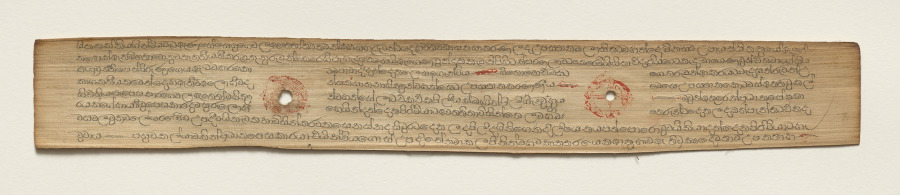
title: Leaf from a Buddhist Manuscript (verso)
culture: Sri Lanka, Singhalese, Late 17th century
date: c. 1700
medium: fiber paper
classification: Manuscript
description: Palm leaf material is still used for manuscripts in Sri Lanka. The palm leaves are prepared first by boiling them, drying them in the sun, and then rubbing them with oils. Scribes then use a metal stylus to incise the text. Then charcoal powder is wiped across the pages, filling in only the inscribed lines.